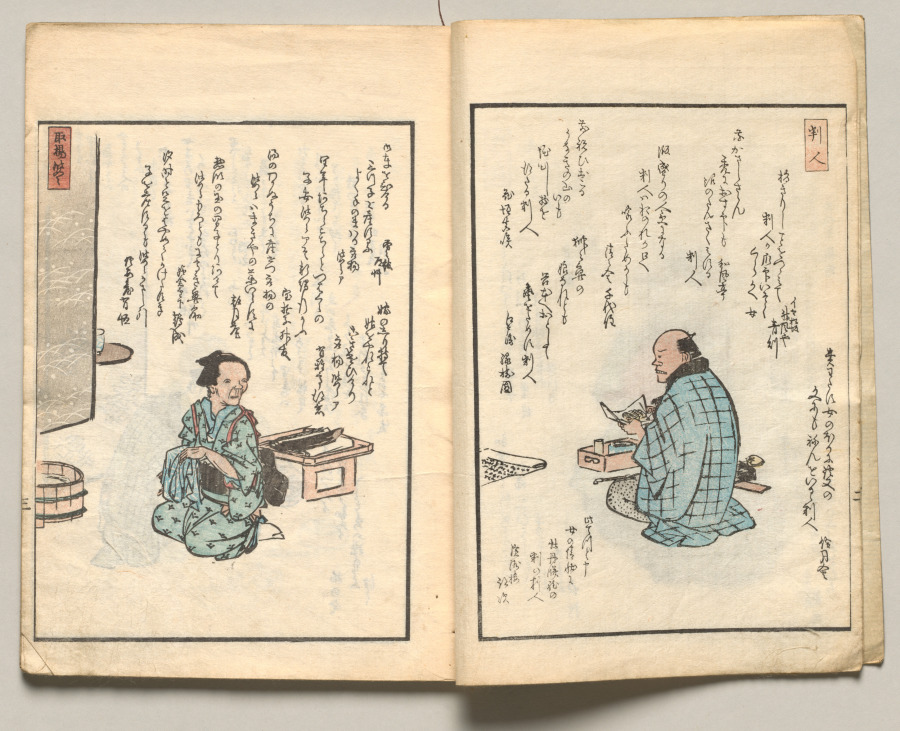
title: Spread Three from Volume Four of People of Japan in Light Verse (Kyōka)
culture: Japan, Edo period (1615–1868)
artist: Utagawa Hiroshige (Japanese, 1797–1858)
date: 1857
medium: Woodblock-printed book; ink and color on paper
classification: Bound Volume